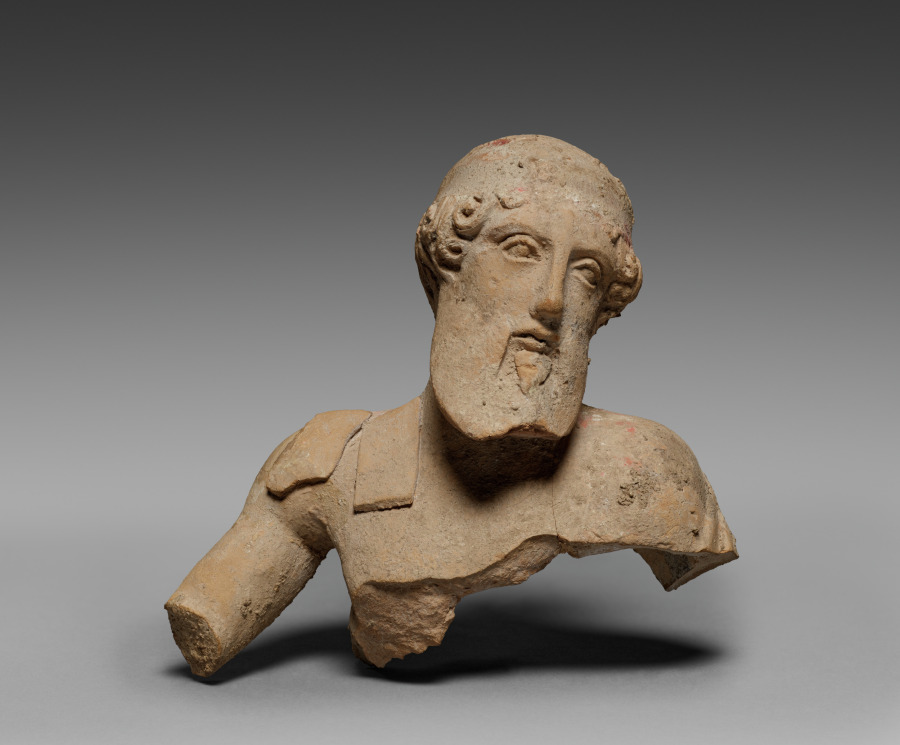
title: Fragment of a Reclining Male Figure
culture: Greek/South Italian, Taranto (ancient Taras)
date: 450–350 BCE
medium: terracotta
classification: Sculpture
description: This terracotta figure depicts a bearded man with his head tilted toward his left shoulder, suggesting that he is reclining. At Greek banquets, the attendees reclined while eating. Banquet imagery was very popular, including in the Greek colonies in Italy. This man likely originally had an elaborate headdress separately made and attached over the smooth part of the head. The clay on the figure’s right shoulder is probably the remains of “ribbons” attached to his headdress. There are traces of red pigment in the hair.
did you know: Tarantine terracotta banqueters were made from molds, with additional handmade details.